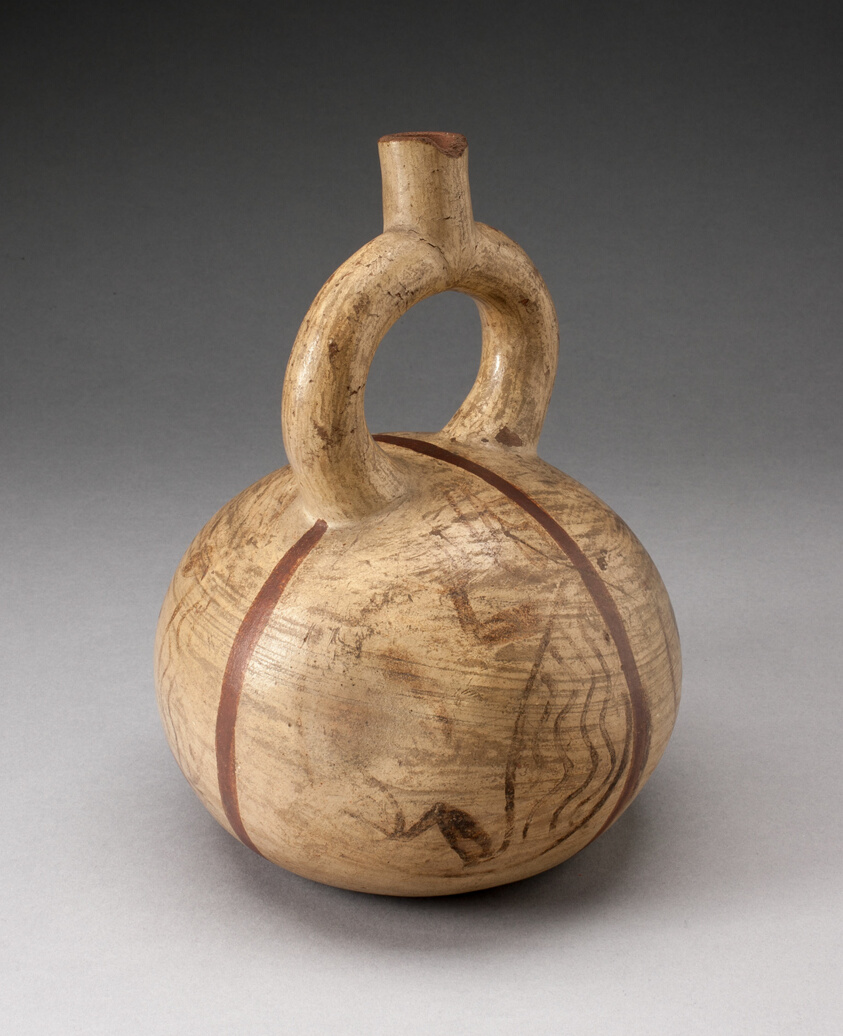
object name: Vessel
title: Globular Stirrup Vessel with Depicting Abstract Animals, Possibly Overpainted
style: moche, andes, Arts of the Americas, south american, andean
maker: Moche (Chimbote, Santa Valley, north coast, Peru)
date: 100 BCE–500 CE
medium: Ceramic and pigment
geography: Peru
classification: earthenware; ceramics; vessel; art of the americas